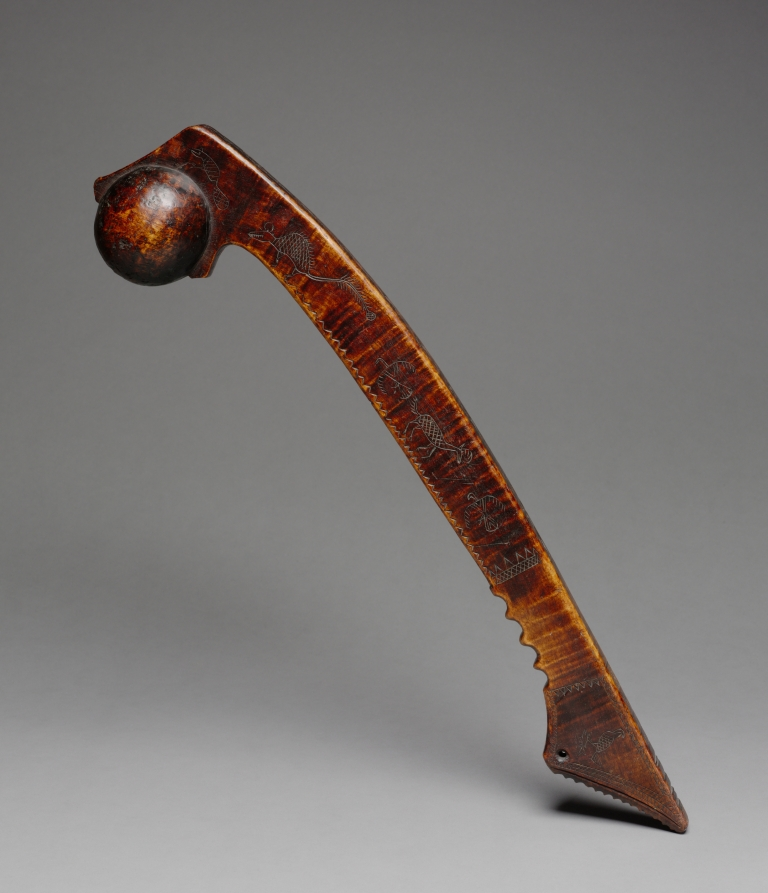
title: Ball-Headed War Club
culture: Native North America, Northeastern Woodlands, Great Lakes, Anishinaabe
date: late 1700s–early 1800s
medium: wood (maple?)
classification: Implements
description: The ball at the striking end of this club is clenched in an abstract, jawlike form that likely refers to a protector animal who endowed the owner with power. Incised on the shaft is a rich record of doodemag (singular, doodem, “totem”)—animals representing other-than-human progenitors from which Anishinaabe peoples trace their descent. (The Anishinaabeg, a group of related Great Lakes nations, include the Odawa, Ojibwe, Potawatomi, and others.) Included is an antlered creature, perhaps a caribou, along with mammals, birds, and powerful spirit beings: the thunderbird, its wings outstretched, and perhaps the long-tailed underwater panther. When this example was made, clubs had become symbols of status and earlier ways of life, having been replaced as favored weapons by metal tomahawks and European firearms. Today, clubs are part of powwow regalia.